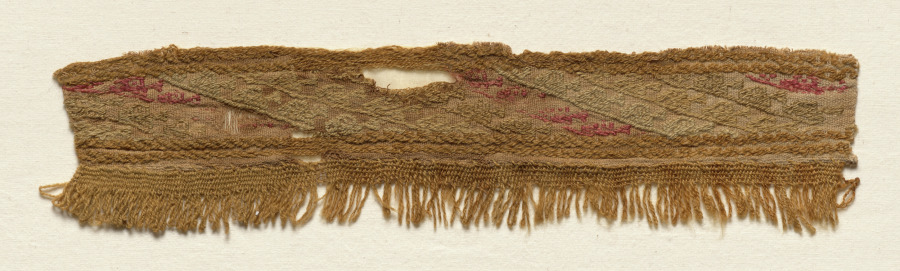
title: Three Border Fragments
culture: Peru, Central Coast, Chancay, 12th-15th century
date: c. 1100–1400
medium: tabby, brocaded; cotton and wool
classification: Textile